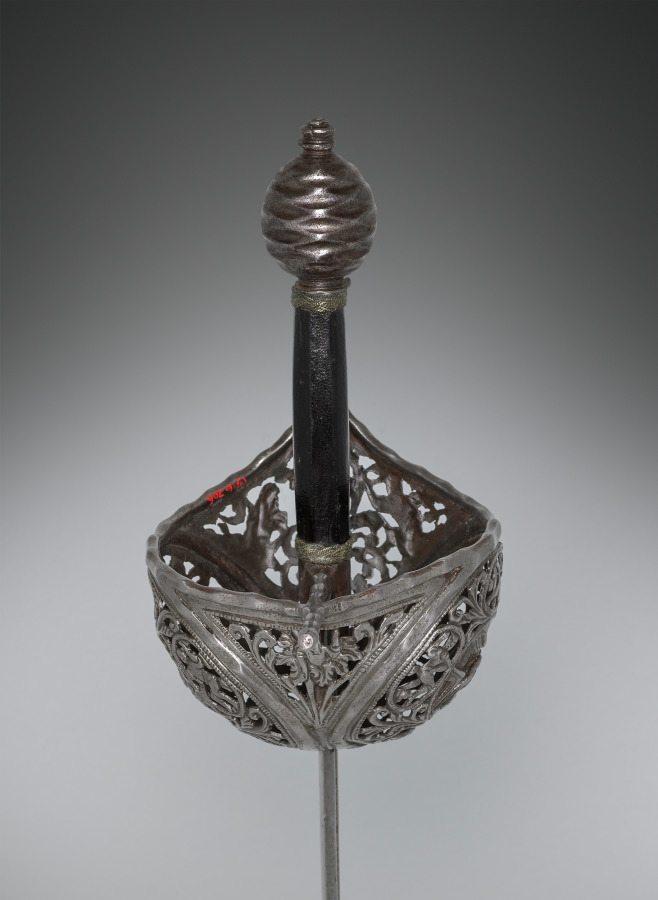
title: Cup-Hilted Rapier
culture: Italy, Milan?, 17th century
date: c.1610–30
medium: steel, pierced, chased and chiseled; wire ferrules on leather-covered wood grip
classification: Arms and Armor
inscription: inscribed on blade: FPNDRITH (on one face) RDFTPHNI (on the other)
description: The rapier was a sword worn with civilian dress and used in duels. The term rapier derives from a 16th-century French word rapière, which in turn derived from the Spanish espada ropera, or “dress sword.” The rapier was a light weapon with a straight double-edged and pointed blade that, with the development of the art of fencing in the 1500s and 1600s, gradually became narrower and lighter, and thus suitable for thrusts only. With the new technique of swordplay emphasizing the point of the blade, sword guards became more complex to protect the duelist’s unarmored hand. These elaborate guards were frequently decorated by various techniques—chiseling, bluing, russeting, and damascening.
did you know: Over time the blade of a rapier became longer, based on a belief that a longer blade made it easier to hit one's adversary and, at the same time stay beyond the reach of his weapon.